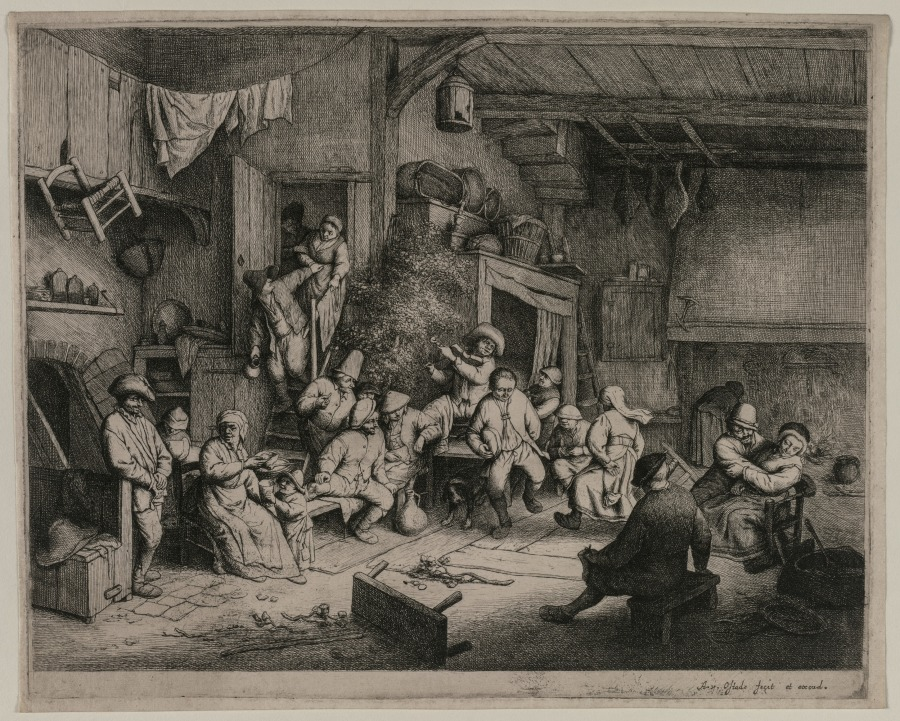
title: The Dance in the Inn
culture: Netherlands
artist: Adriaen van Ostade (Dutch, 1610–1684)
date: 1652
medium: etching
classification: Print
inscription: With the stomping figures and gathering of drinking, smoking, and canoodling revelers, Ostade captured the raw spirit of tavern music and the earthy vitality of peasant songs. The tree visible behind the fiddler suggests that this may be a May Day celebration, whose festivities heralded the arrival of spring.